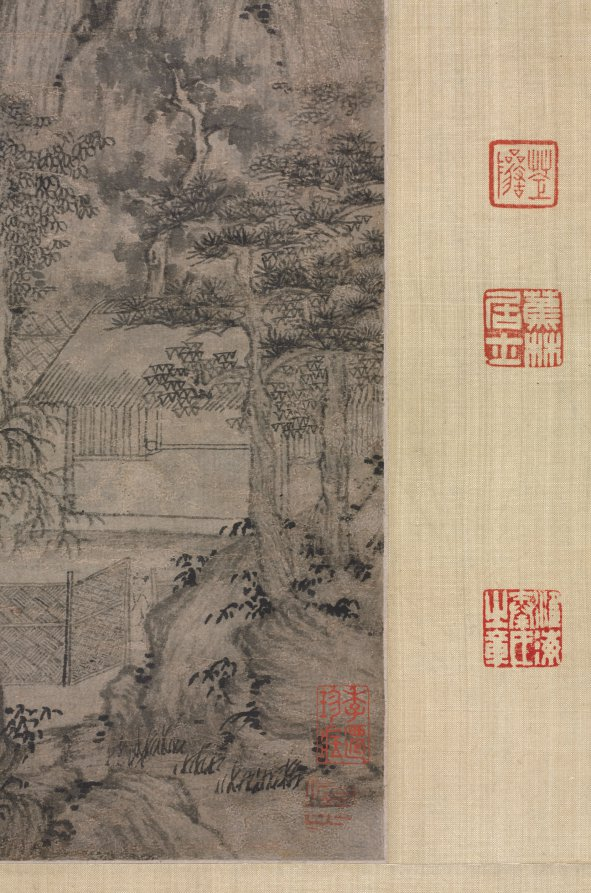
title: Streams and Mountains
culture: China, Yuan dynasty (1271-1368)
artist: Xu Ben (Chinese, 1335–1380)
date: 1372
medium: hanging scroll, ink on paper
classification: Painting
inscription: 綠樹黃鸝處處山， 偶從谿上看雲還。/ 人生未許全無事， 纔得登臨便是閑。 壬子七月十日徐賁為吉夫先生畫 並詩共上 [印] 幼文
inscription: Label on mounting probably by Liang Qingbiao 梁清標 (1620–1691).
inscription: 4 additional inscriptions and 9 additional seals: 1 poem of Xie Hui 謝徽 (c. 2nd half 14th c.); 1 poem and 1 seal of Gao Qi 高啟 (1336–1374); 1 poem and 1 seal of Lu Zhen 盧貞 (c. late 14th c.); 1 poem of Huang Zai 黃載; 3 seals of Liang Qingbiao 梁清標 (1620–1691); 1 seal of Wang Jiqian [C. C. Wang] 王季遷 (1907–2003); 3 seals unidentified.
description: Like many literati of the late Yuan and early Ming dynasties, Xu Ben was entangled with the perils of dynastic change as well as the ups and downs of his official career. It was mainly through the art of painting and poetry, as well as the ideal of reclusion, that he sought feelings of exhilaration and shared them with his friends. Xu created this monumental landscape during one of his periods of reclusion. His innumerable “hemp-fiber” texture strokes create a unifying rhythm among the towering mountains with tightly knit masses of rocks. Nestled among shady trees at the base of the mountain is a rustic retreat, which a scholar approaches on foot to visit with the hermit. Among the five inscriptions at the top of the painting is one by the artist himself. He dedicated the painting to someone named Jifu 吉夫 and recorded a poem in praise of mountains. Green trees, yellow orioles, everywhere are mountains; Aimlessly I return from the stream, where I watched the clouds. Man's life does not allow unbroken ease, But to be able to be high up in the mountain, this is leisure.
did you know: An attendant opens a reed gate to welcome the scholar with a walking stick approaching the rustic retreat.